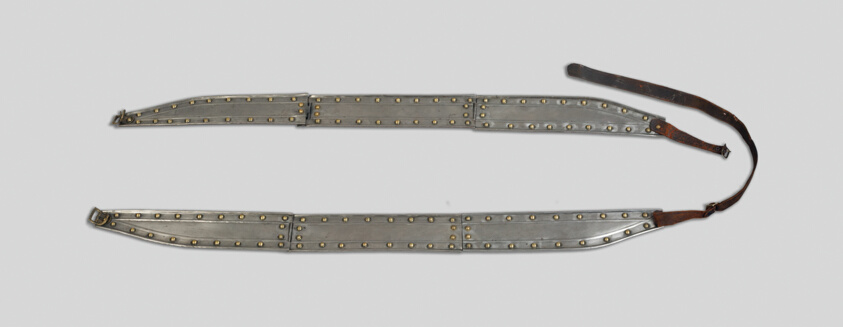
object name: Armor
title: Pair of Armored Reins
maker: German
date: 19th century in 16th century German style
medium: Steel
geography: France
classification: horse equipment; armor; arms and armor